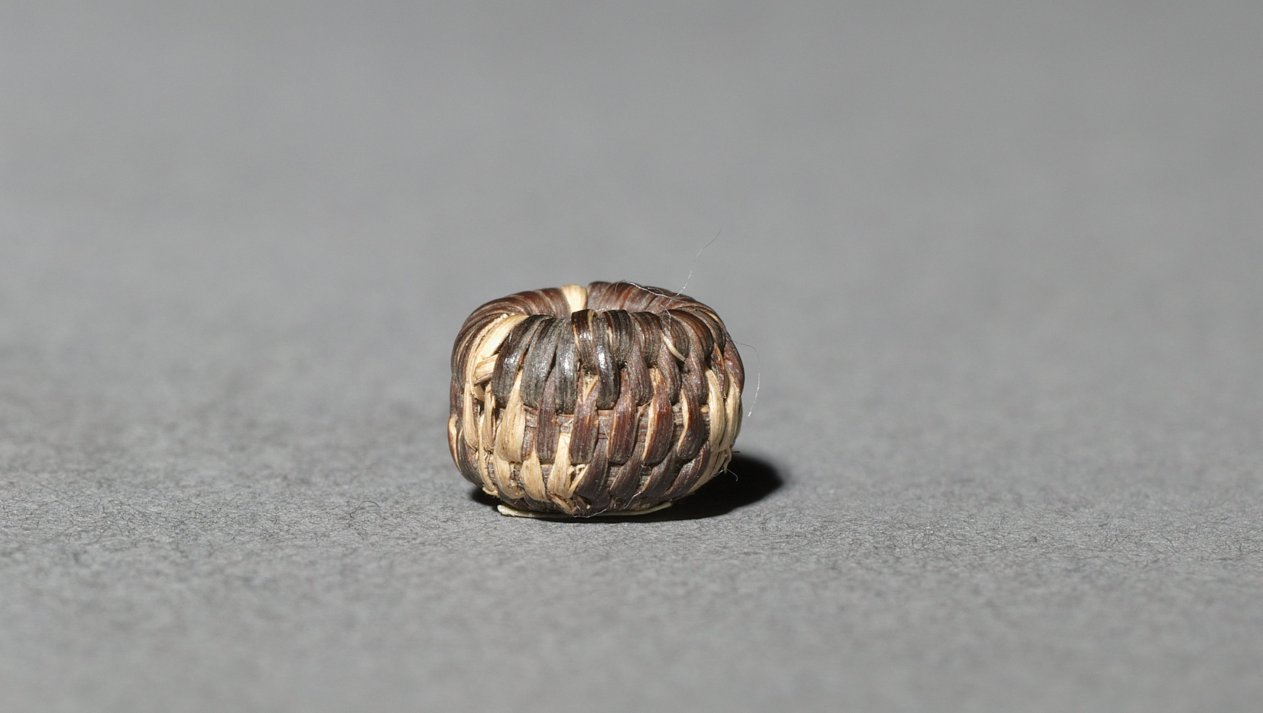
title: Miniature Basket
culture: America, Native North American, Southwest, Arizona, Akimel O'odham (Pima), Unassigned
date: before 1923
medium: plant fiber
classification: Basketry